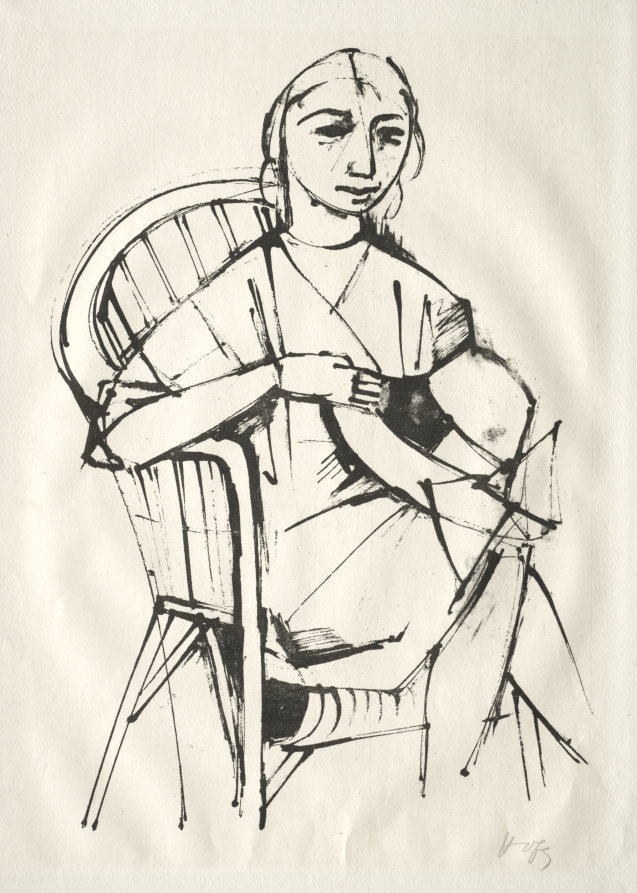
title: Milliner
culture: Germany, 20th century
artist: Karl Hofer (German, 1878–1955)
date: 1922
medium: lithograph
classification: Print